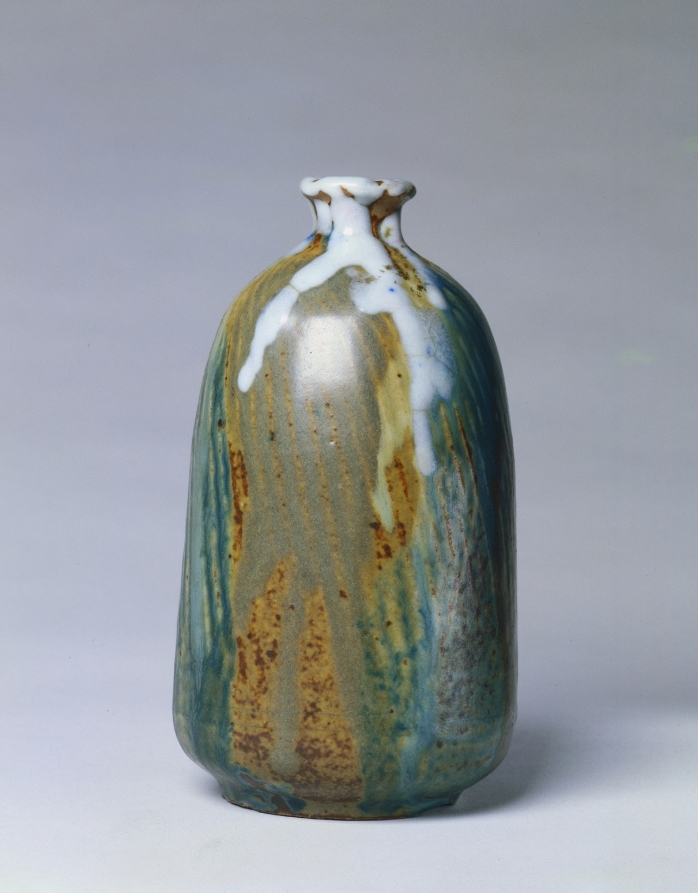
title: Vase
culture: France, 19th century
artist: Jean Carriès (French, 1855–1894)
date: c. 1890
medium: stoneware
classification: Ceramic